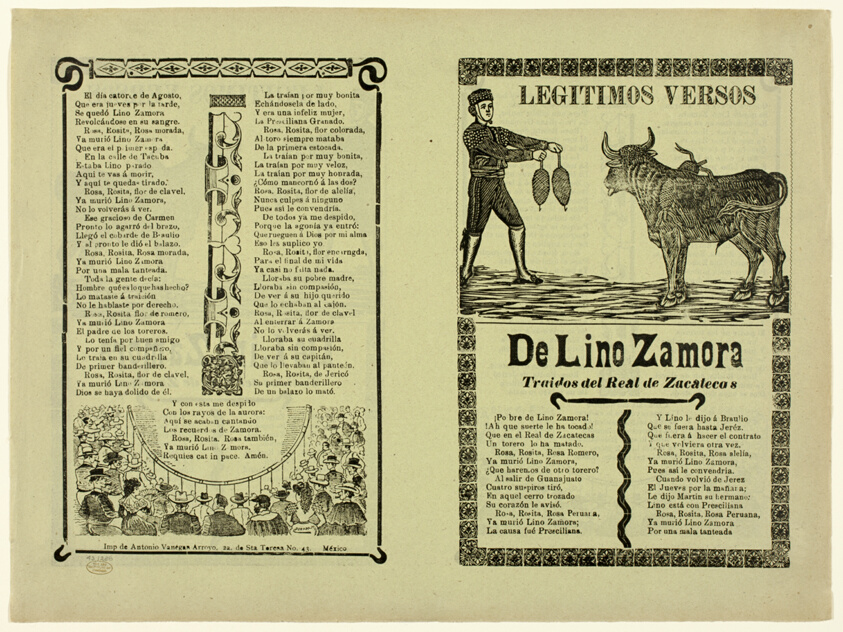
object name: Print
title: True Verses about Lino Zamora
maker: José Guadalupe Posada (Mexican, 1852-1913); or Manuel Manilla (Mexican, 1830-c. 1900)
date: 1911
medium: Photo relief etching on green wove paper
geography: Mexico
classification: prints and drawing; relief etching; print